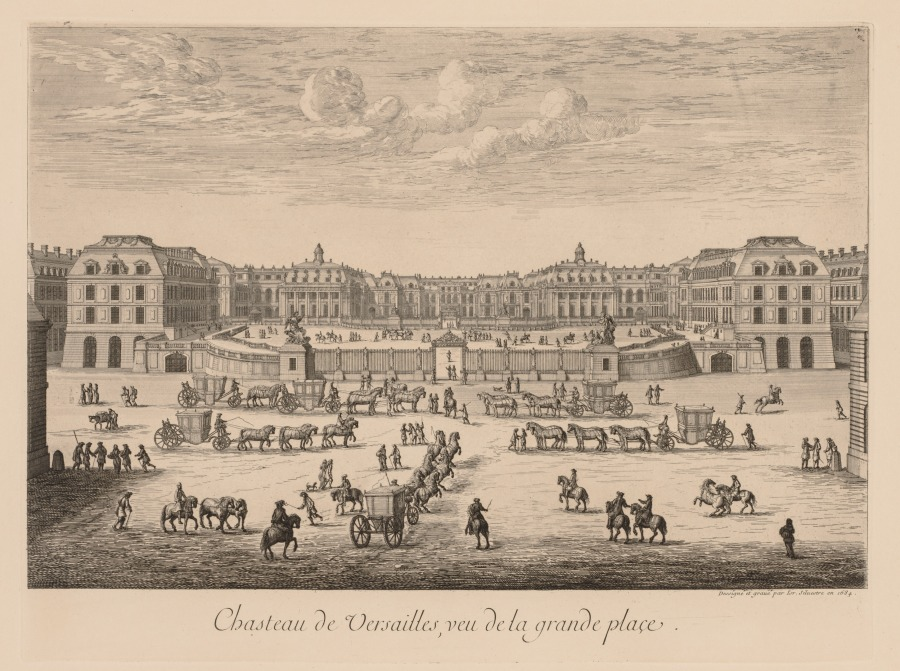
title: Vue du Château de Versailles, vu de la Grande Place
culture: France, 17th century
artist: Israël Silvestre (French, 1621–1691)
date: 1684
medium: engraving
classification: Print